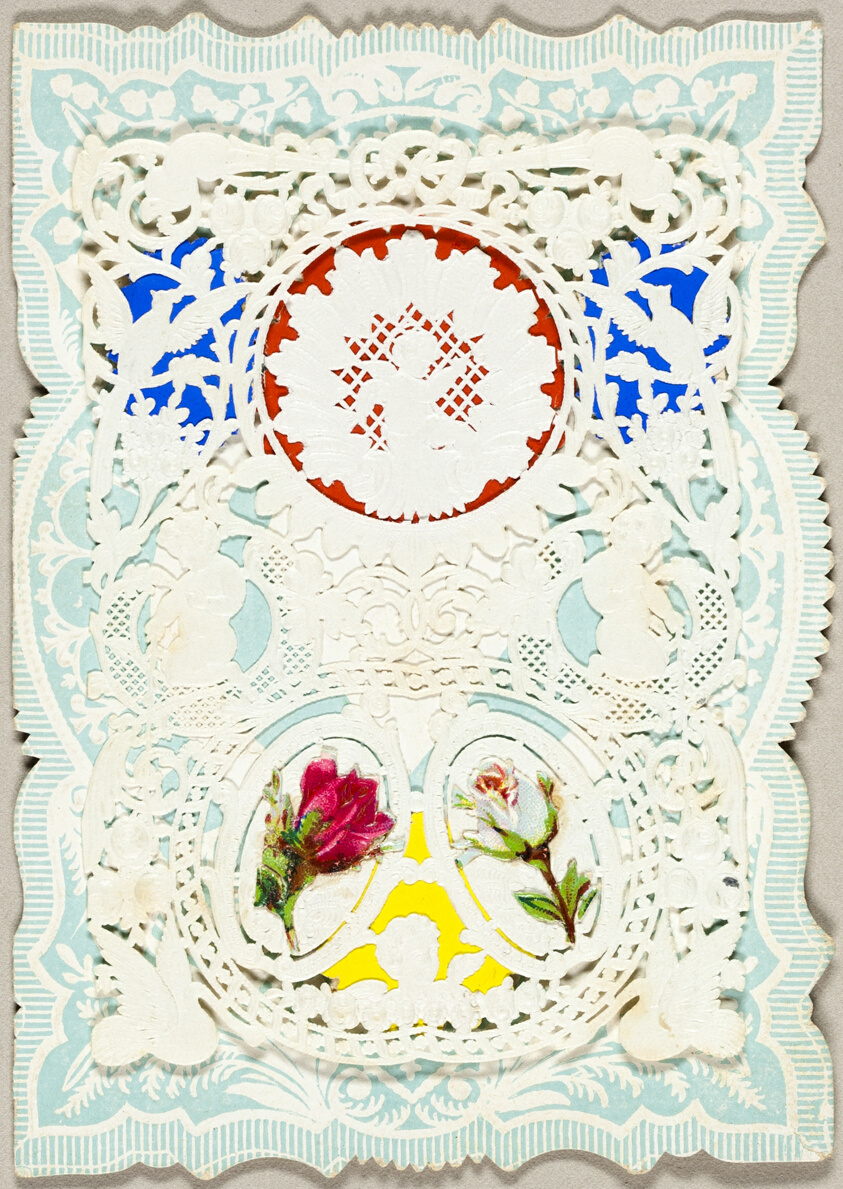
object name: Drawing and Watercolor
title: Untitled Valentine (Flowers and Putti)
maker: Mullord Brothers (English, 19th century)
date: 1850/70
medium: Collaged elements on cut and embossed (designed) ivory wove paper, laid down on blue printed ivory wove paper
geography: England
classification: collage; valentine; prints and drawing; paper